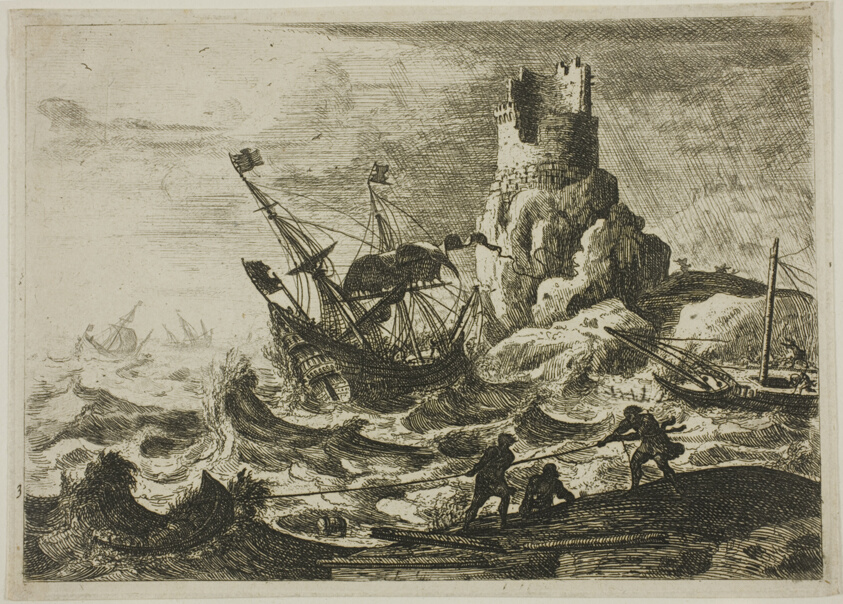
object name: Print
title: The Shipwreck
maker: Claude Lorrain (French, 1600-1682)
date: 1638/41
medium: Etching on ivory laid paper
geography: France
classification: etching; print; prints and drawing